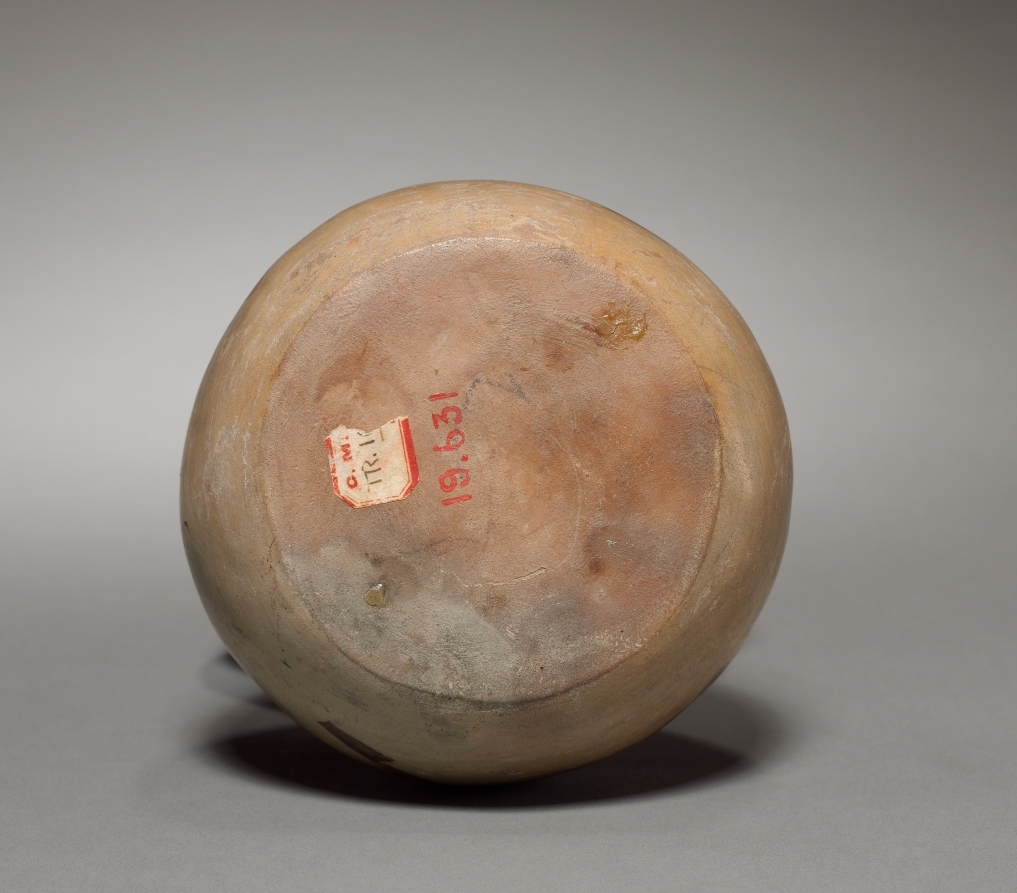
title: Bottle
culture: Peru, Chimú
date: c. 200–400 CE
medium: pottery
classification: Ceramic